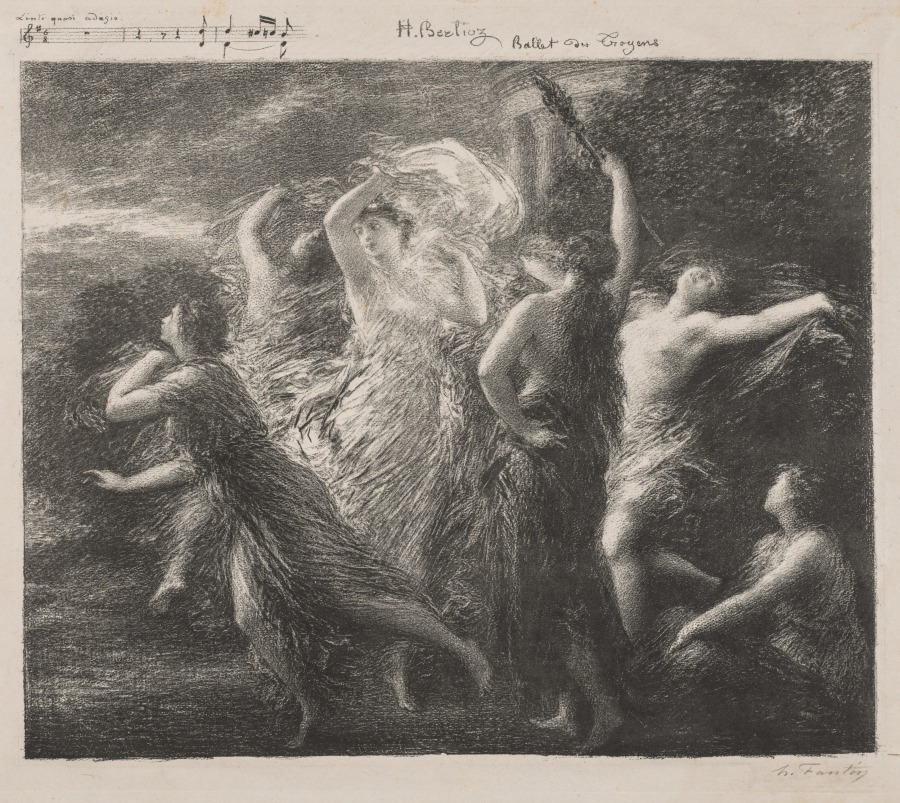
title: Ballet du Troyons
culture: France, 19th century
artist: Henri Fantin-Latour (French, 1836–1904)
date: 1893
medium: lithograph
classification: Print